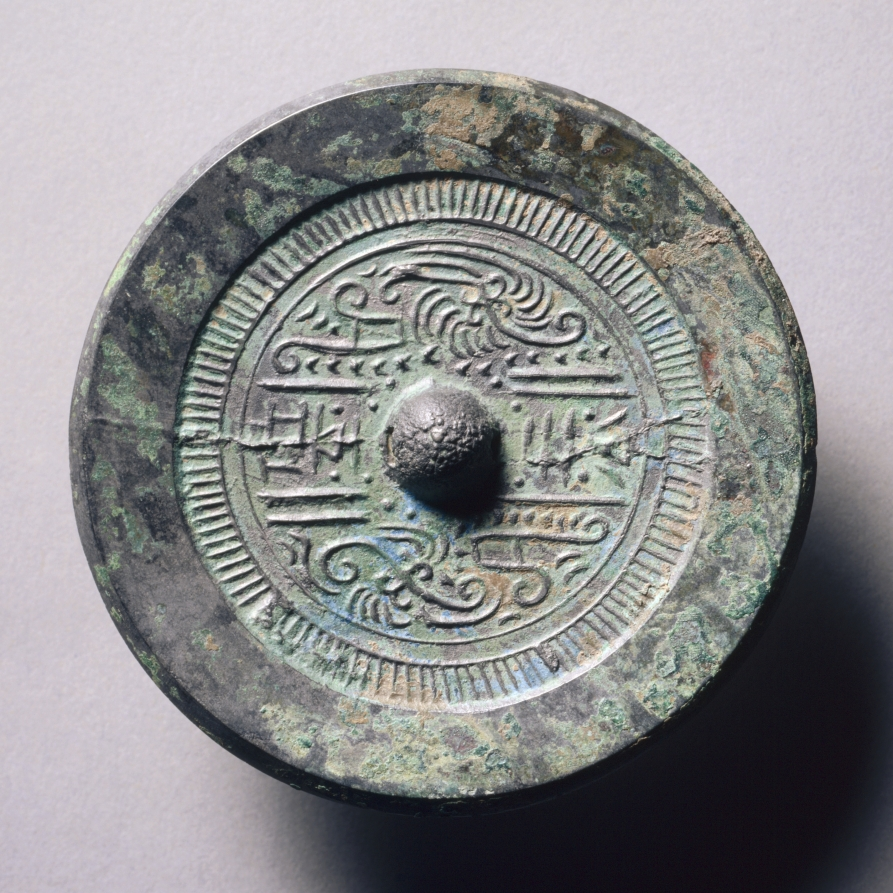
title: Mirror with Paired Phoenixes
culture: China, Eastern Han dynasty (25–220 CE)–Western Jin dynasty (265–316)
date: 25–316 CE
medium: bronze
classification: Metalwork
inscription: 位至三公